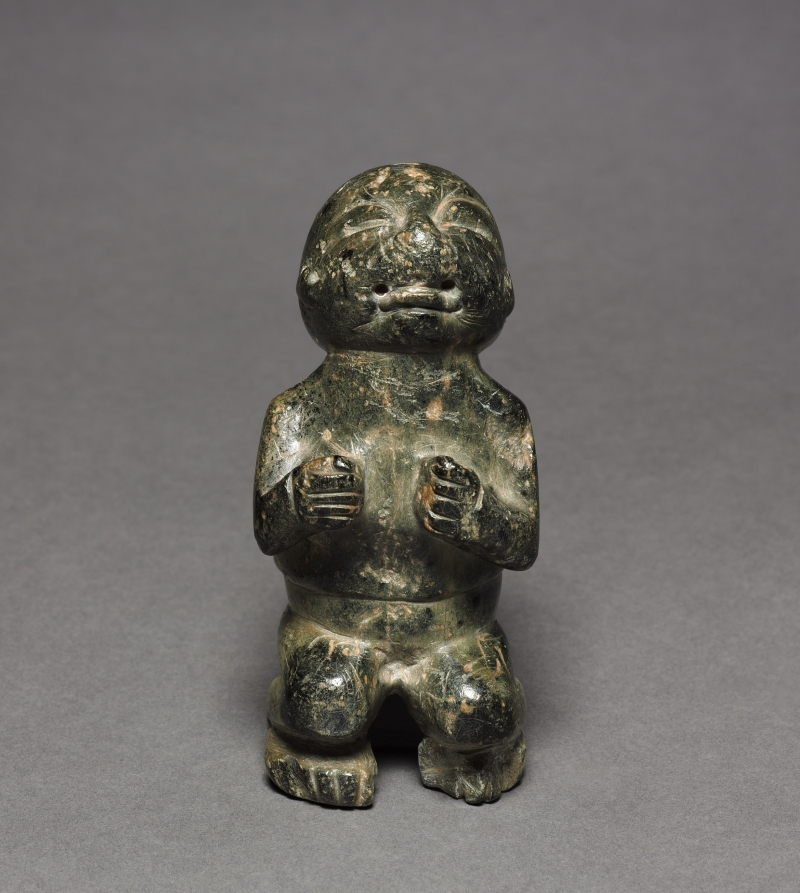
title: Crouching Figure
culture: Mexico, Guerrero, Olmec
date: 900–300 BCE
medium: serpentine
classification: Sculpture